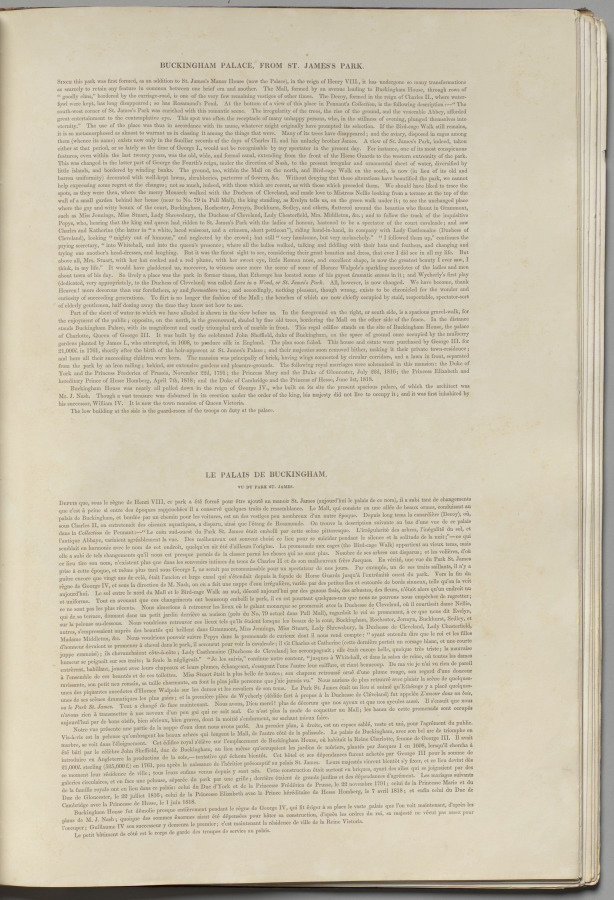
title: London As It Is: Buckingham Palace, from St. James's Park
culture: England, 19th century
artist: Thomas Shotter Boys (British, 1803–1874)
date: 1842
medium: lithograph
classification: Bound Volume